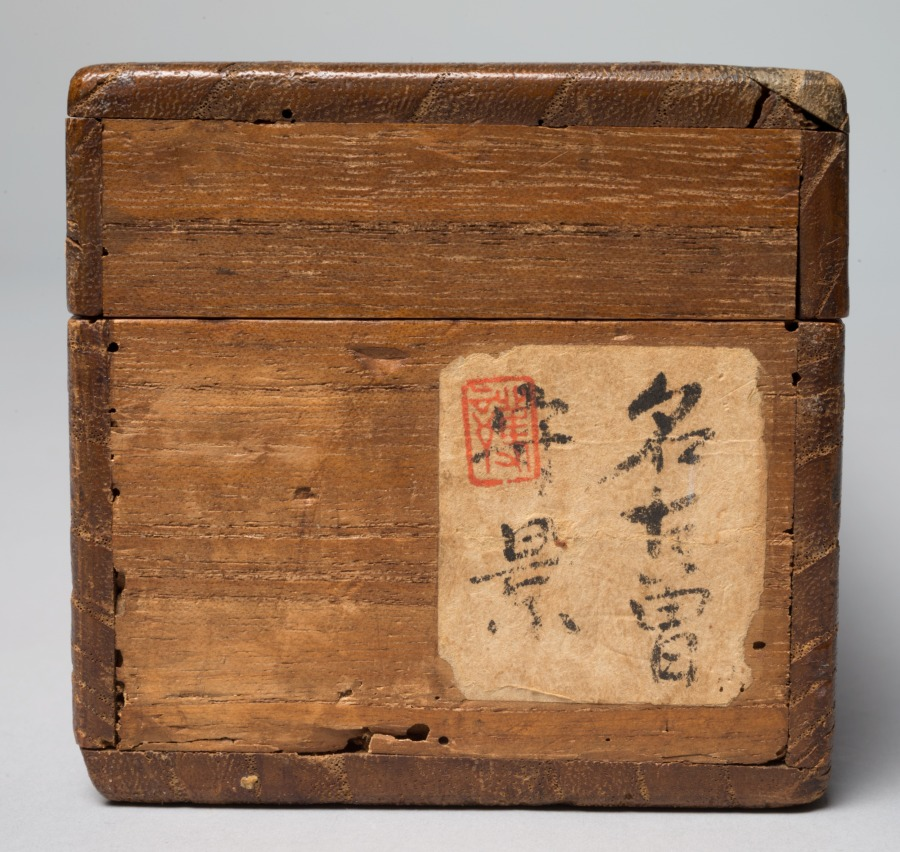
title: A Samurai on Horseback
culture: Japan, Edo period (1615–1868)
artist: Kusumi Morikage (Japanese, active c. 1620–1690)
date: mid- to late 1600s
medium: hanging scroll; ink and slight color on paper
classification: Painting